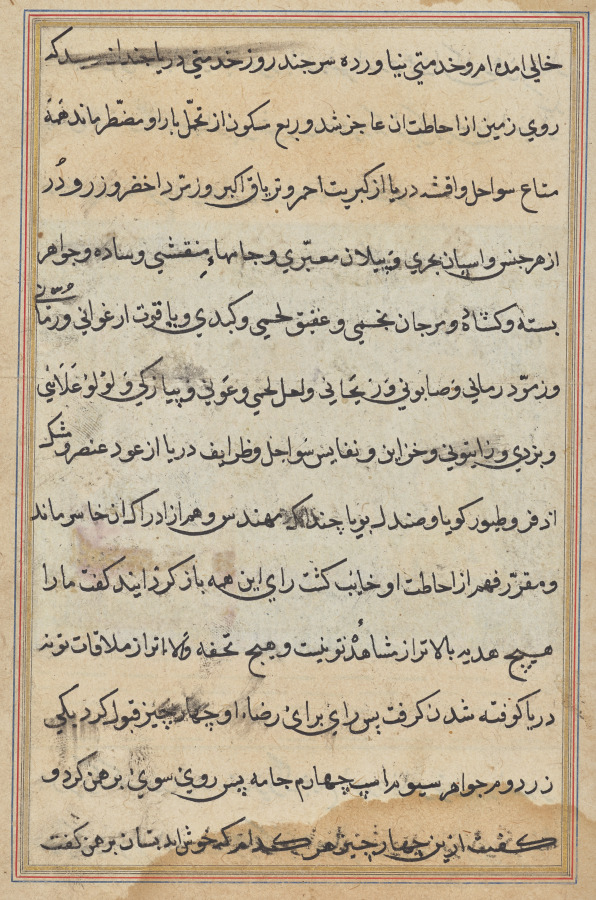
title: Page from Tales of a Parrot (Tuti-nama): text page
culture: Mughal India, court of Akbar (reigned 1556–1605)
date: c. 1560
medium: gum tempera, ink, and gold on paper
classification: Painting